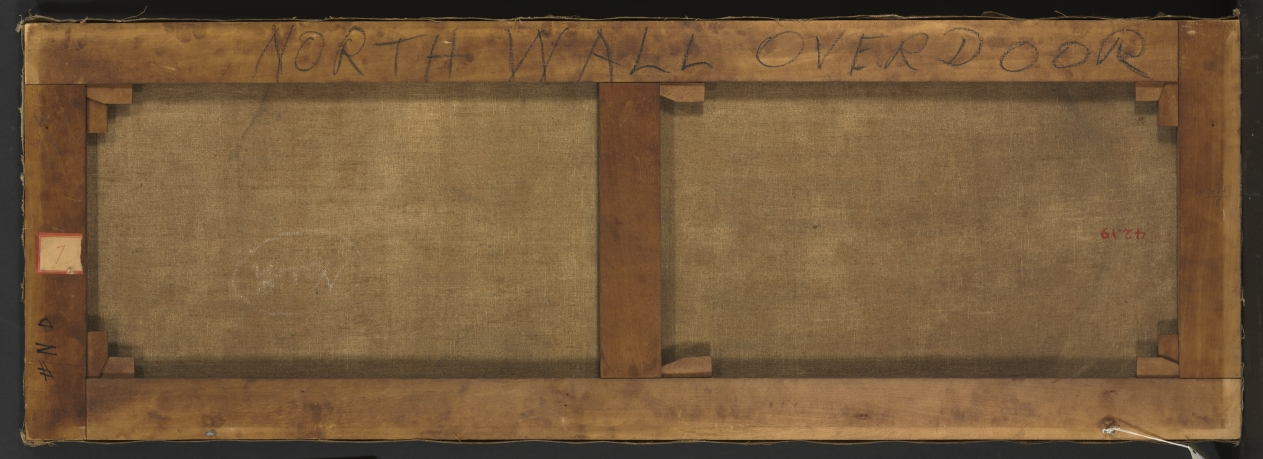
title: Overdoor Painting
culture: France, 18th century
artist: Pierre Rousseau (French, 1751–1829)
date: 1790s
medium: oil on canvas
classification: Painting